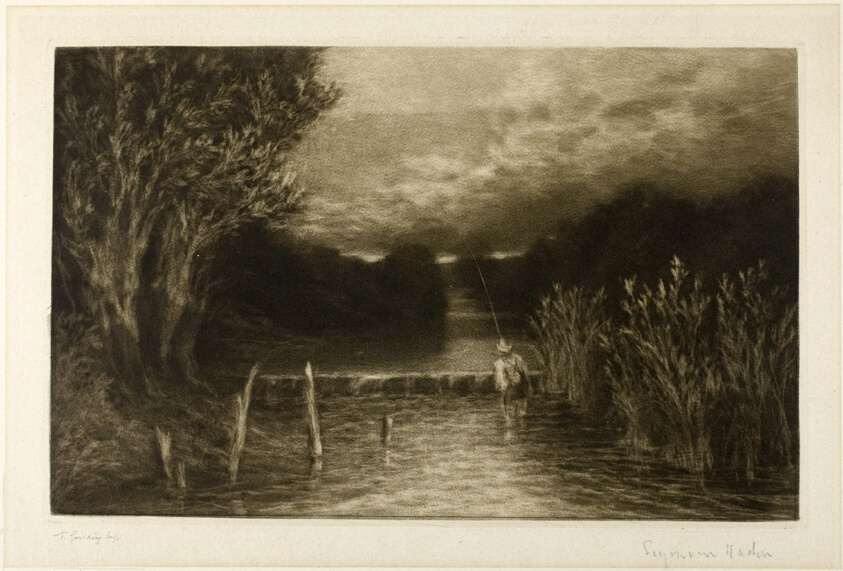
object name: Print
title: Grayling Fishing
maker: Francis Seymour Haden (English, 1818-1910)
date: 1897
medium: Mezzotint with drypoint on ivory laid paper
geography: England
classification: mezzotint; print; prints and drawing